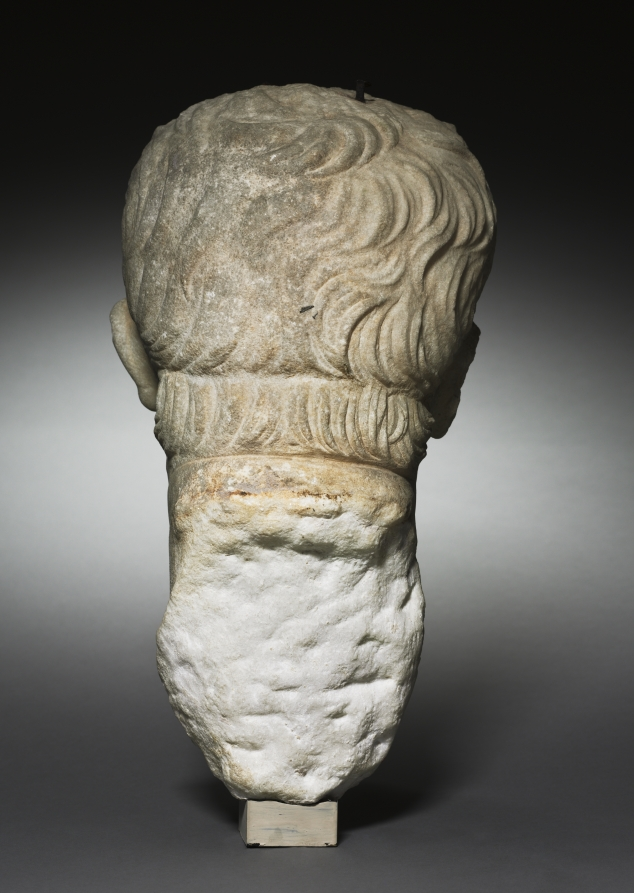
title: Portrait Head of Emperor Vespasian, Recut from Head of Nero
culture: Italy, Roman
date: 64–79 CE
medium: marble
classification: Sculpture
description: Although this portrait head was designed to fit into a statue of a body, it did not originally belong with the togate body that held it when purchased by the museum in 1929. In 1973, the two were separated, and the body is now in storage. The head itself was recarved in antiquity, from a likeness of Nero to one of Vespasian, following the damnatio memoriae (condemnation of memory) of the former. A line at the back of head shows clearly where the long hair of Nero has been shortened, while other Neronian features, such as a receding lower lip, remain.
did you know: Originally a portrait of Emperor Nero, this head was recarved after his damnatio memoriae (condemnation of memory).